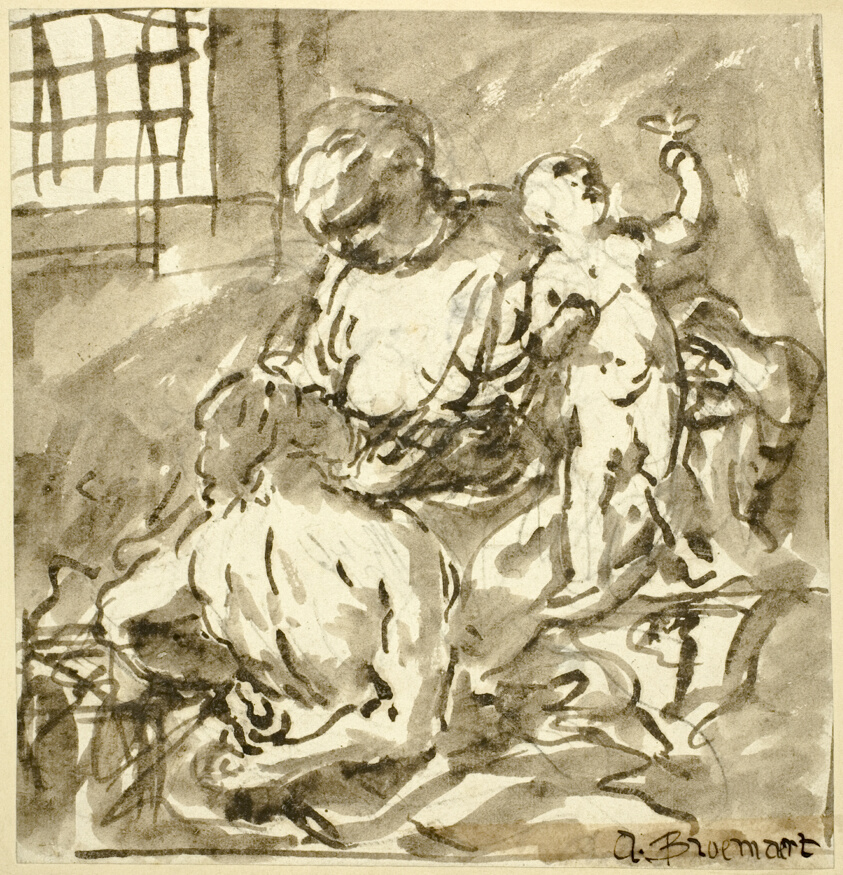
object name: Drawing and Watercolor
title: Caritas Romana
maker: Attributed to Abraham Bloemaert; Dutch, 1566-1651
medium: Brush and brown ink with wash, over traces of black chalk, on off white laid paper, laid down on cream card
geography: Netherlands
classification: pen and ink drawings; drawings (visual works); prints and drawing